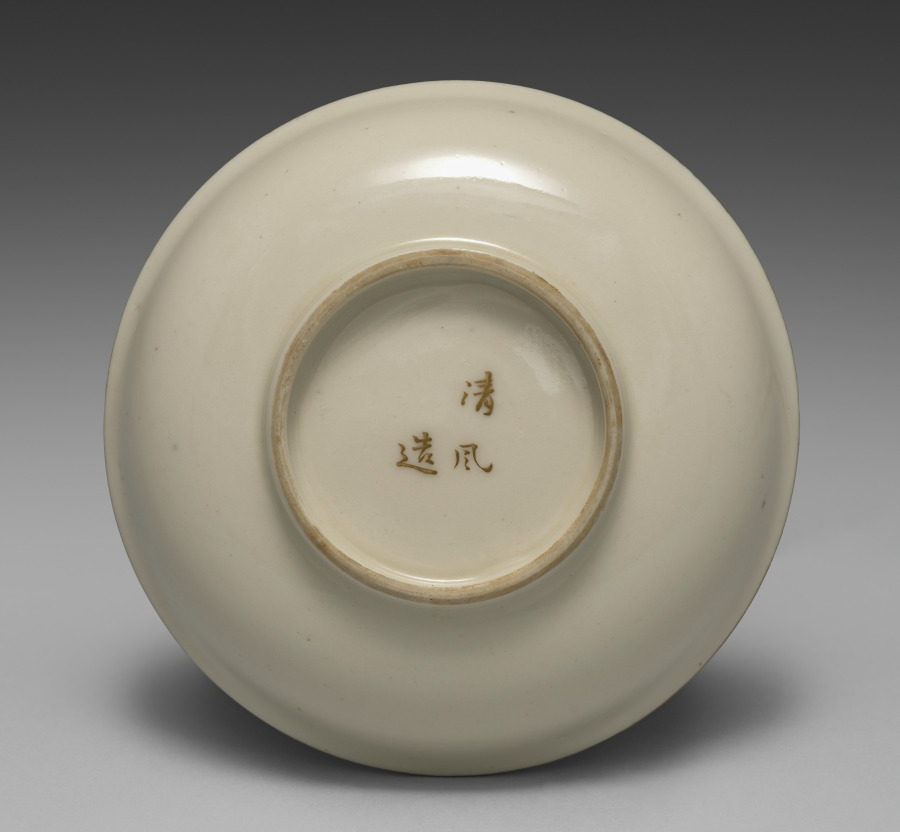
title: Small Dish from Dining Set with Plum Blossoms and Cracked-Ice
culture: Japan, Meiji period (1868–1912)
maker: Seifū Yohei II (Japanese, 1844–1878)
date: c. 1875–78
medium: Porcelain with molded designs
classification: Ceramic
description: Each item in this set has a delicate low-relief design of flowering plum branches over scattered, intersecting lines meant to resemble the cracked-ice surface of a frozen body of water and is signed on the base in gold pigment. While Yohei II produced many fine works in underglaze blue, like those produced by Kiyomizu Shichibei, he also made works in quite different styles later in his career, from the early 1870 s. In 1873, he was appointed purveyor to the Industrial Center of Kyoto Prefecture, a designation associated with Kyoto’s efforts to reach an international market through the port of Kobe; and from 1875 until his death, he was involved in national-level projects to present Japanese ceramics across the world. It was during this period that Yohei III was apprenticed to Yohei II, and it has been suggested that this set may in fact be an early example of Yohei III’s work, which he signed with his teacher’s name. Decorated with flowers resembling Japanese textile motifs, the set calls to mind the design of Yohei II’s pair of vases with plum blossoms in the Victoria and Albert Museum. Here, the elaborate trees created for a formal public exhibition setting have been translated into the approachable blossoms of the genteel domestic environment. While the designs are consistent across the pieces, each raised flower petal and pistil and each incised line in the ice was done by hand, so the cups, bowls, and dishes are similar yet unique. The bottoms of two boxes once identified the set’s owner, but the information has been deliberately obscured with black ink. However, inscriptions still visible appear to indicate two occasions, once at the end of July 1886 , and once again in June 1916 , when parts of the set were requested from Hokura in Niigata Prefecture. The location corresponds to a neighborhood in the present-day city of Jōetsu. The surname Tsuji 辻 also appears on a paper tag affixed to one of the box cloths. Future research may possibly reveal more about their provenance. A vase by Yohei III in a private collection combines the formal grandeur of the Yohei II vases in the Victoria and Albert Museum with the gentler design of this dining set, placing flowering plum trees against soft, scalloped-edge clouds resembling those in golden screens.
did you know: The dining wares have a creamy white coloration that the four boxes containing them identify as Korean in style.